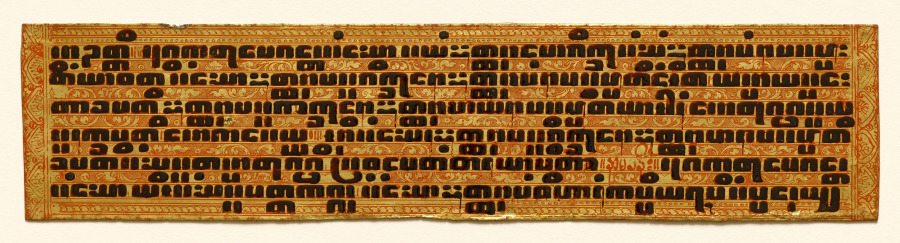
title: Text, folio 14 (recto) from a Kammavacha: Buddhist ordination text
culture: Myanmar (Burma)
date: 1800s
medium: Leaf: lacquer and gilding on cloth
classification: Manuscript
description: In premodern Burma, lay people commissioned lavishly ornamented manuscripts for ceremonial occasions, when officiants would read aloud from the text. Written in black lacquer, the text is in the language of Pali written in a Burmese script. It contains ordination rites and procedures for monastic ceremonies. The second to last page is covered with intricately drawn, winged celestial beings (nats) in gestures of praise. They fly amid intertwining vegetation—denoting bounty—that grows from serpentine forms that refer to rain clouds. Lionlike forms inhabit the space with them. The top and bottom covers are equally ornamented with jeweled floral patterning.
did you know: The Pali text of this manuscript is written in Burmese square script, which is also known as "tamarind seed script."